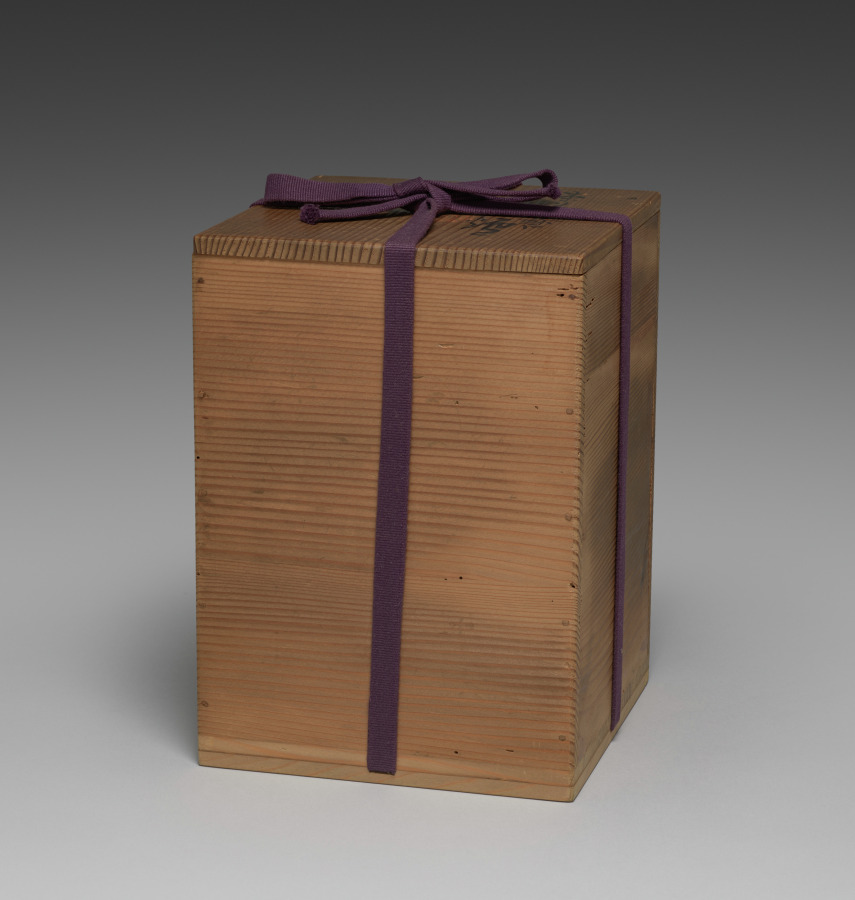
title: Incense Burner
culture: Japan, Meiji period (1868–1912)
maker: Seifū Yohei III (Japanese, 1851–1914)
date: 1895–1914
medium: Porcelain with tea-leaf colored glaze and molded design and geometric openwork silver lid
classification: Ceramic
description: Kyoto-based Japanese ceramist Seifū Yohei III (1851–1914) admired the glaze colors found on Chinese porcelain and tried to replicate them through intensive experimentation. His green and creamy white glazes were particularly well received. The combinations of colors with subtle molded and incised decorations in his ceramics respond powerfully to changes in light, creating a dynamic viewing experience. Names for the glazes, written in ink with a brush on the lids of the custom-made storage boxes for the works, often indicate a specific glaze or ware that had inspired him, even when the resulting color was distinctively his own.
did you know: This incense burner with a geometric-patterned silver lid has a glaze identified on its box lid as “tea leaf [color–glazed] porcelain” (chayōji).